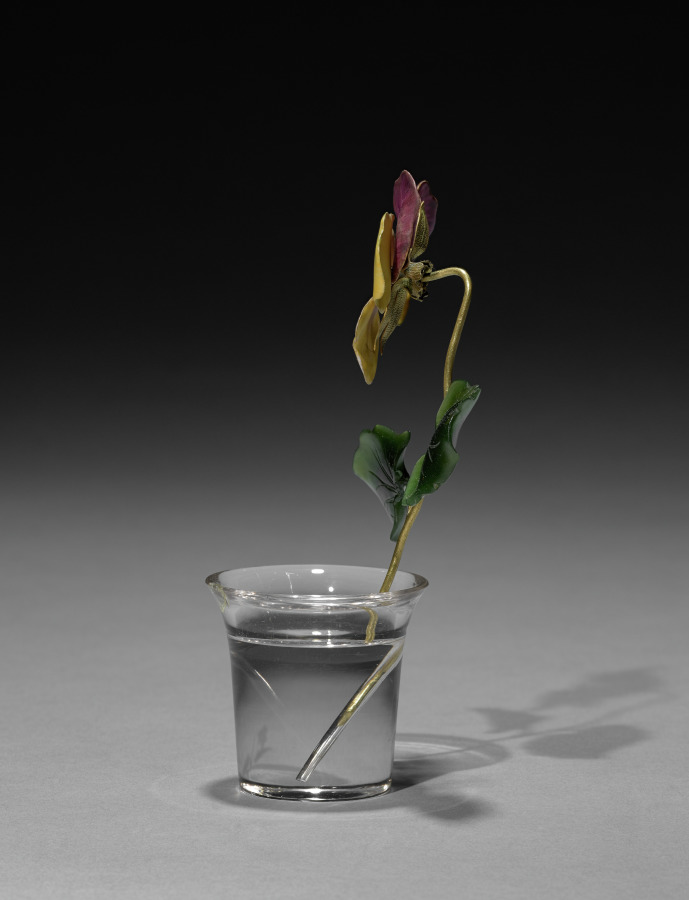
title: Flower Study of a Pansy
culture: Russia, St. Petersburg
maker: House of Fabergé (Russian, 1842–1918)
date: c. 1885–1915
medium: gold, jade, enamel, rock crystal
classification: Miscellaneous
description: This flower study depicts a pansy in bloom. Fabergé’s inspiration for his flower studies is said to have come from the floral brooches of precious stones that were made in the 1700s for Catherine the Great as well as from the Japanese art of flower arranging, known as ikebana. Small and delicate, Fabergé’s flower studies were given as intimate gifts to friends by the tsarina and others in the court. She also liked to take them around to wherever the imperial family was residing as a reminder of spring during the harsh Russian winters.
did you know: The stems of Fabergé’s flower studies are set into little basins carved from rock crystal to resemble pots of water.